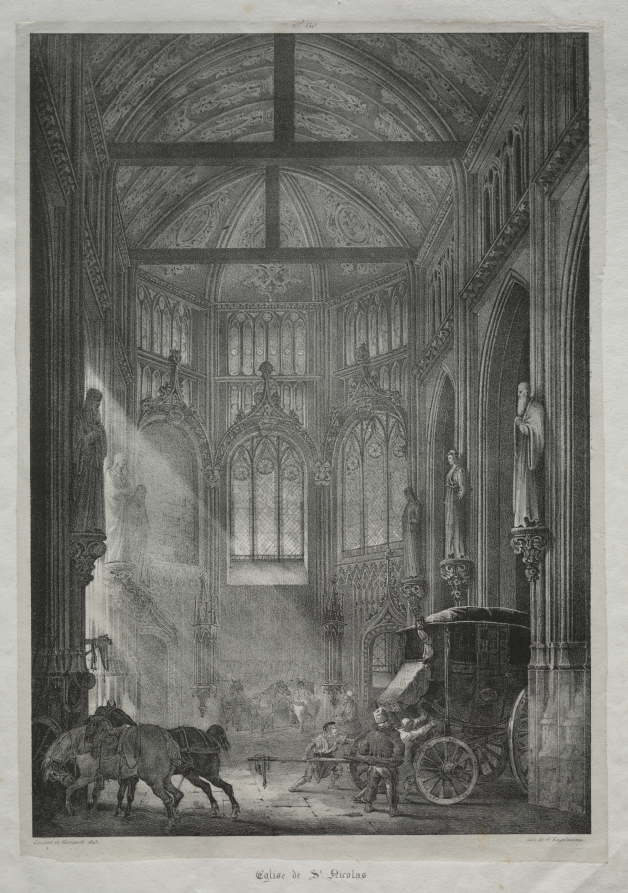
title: Church of St. Nicholas, Rouen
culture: France, 19th century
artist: and Charles Louis Lesaint (French, 1795–after 1843)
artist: Théodore Géricault (French, 1791–1824)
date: 1823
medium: lithograph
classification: Print